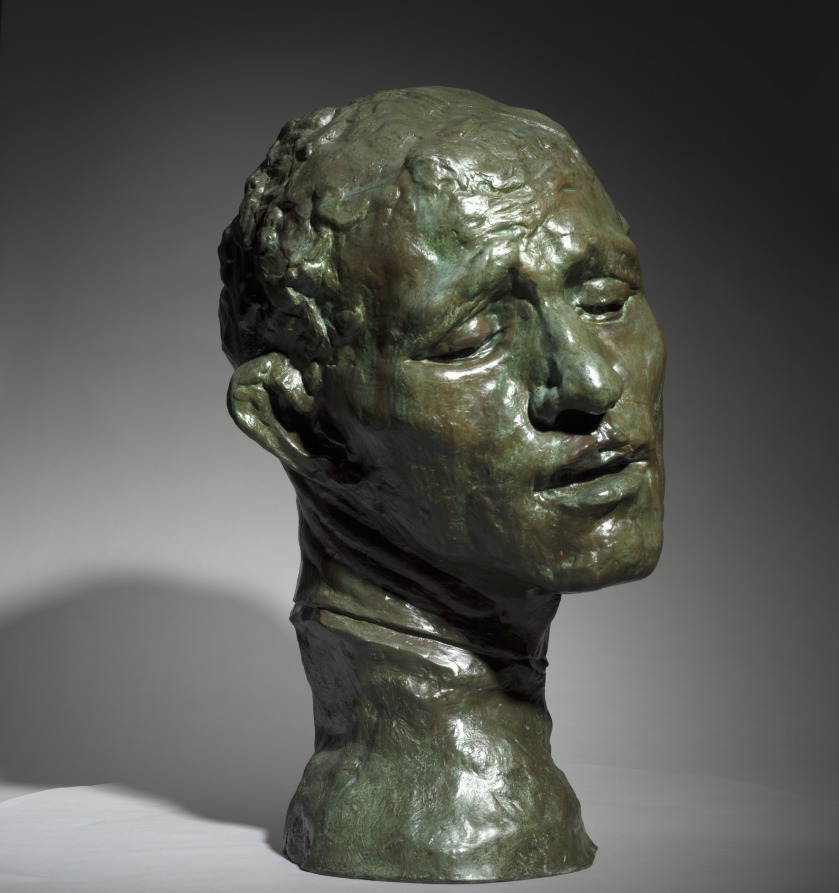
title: Heroic Head of Pierre de Wissant, One of the Burghers of Calais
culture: France, 19th century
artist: Auguste Rodin (French, 1840–1917)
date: 1886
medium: bronze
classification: Sculpture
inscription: inscribed at neck, left: A.Rodin; inscribed lower back: Alexis Rudier/Fondeur-Paris.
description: This sculpture depicts one of the figures in Rodin’s large public monument The Burghers of Calais (1884–89), featuring six French men who volunteered to be taken prisoner by the English in exchange for lifting the siege of Calais during the Hundred Years War (1337–1453). Pierre de Wissant’s anguished expression suggests extreme mental suffering as he contemplates his expected execution. Rodin exhibited a life-size version of the figure as an independent work before completing the monument. He later made multiple versions in various sizes and media.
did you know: This sculpture depicts the head of a figure from Rodin's large public monument The Burghers of Calais (1884-89). The CMA also owns a plaster version of the head.